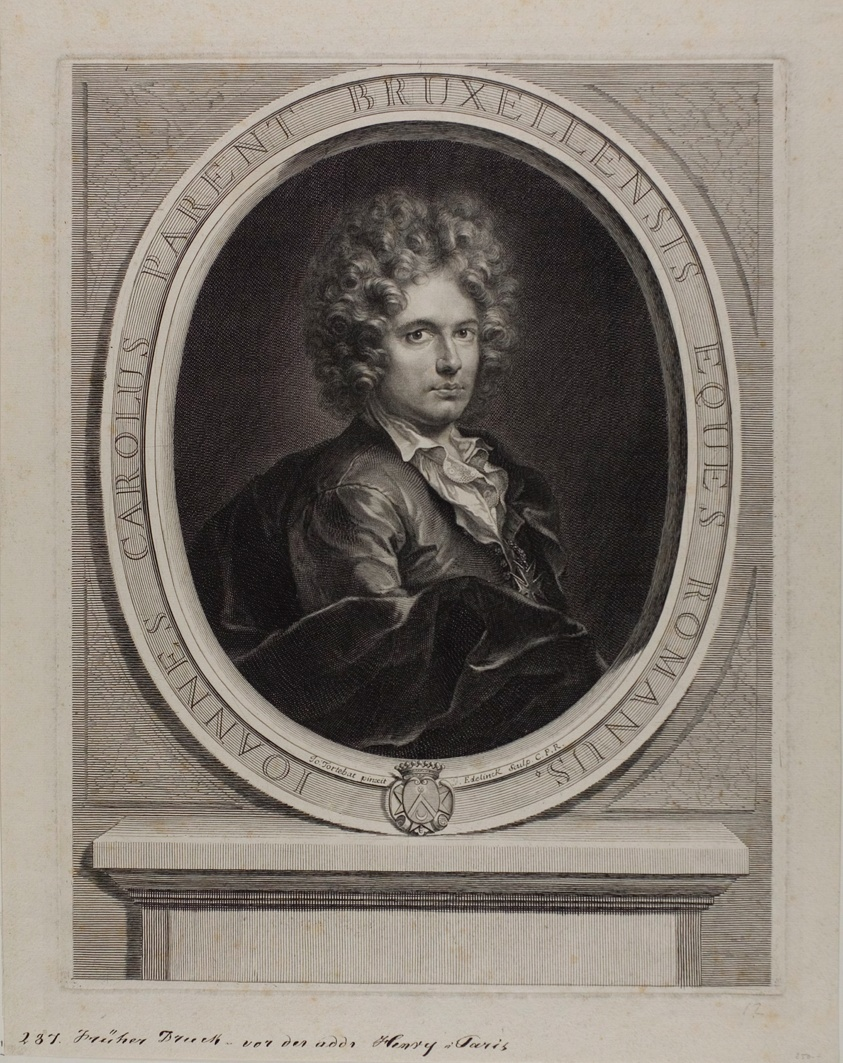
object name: Print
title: Jean-Charles Parent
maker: Gérard Edelinck (French, born Flanders, 1640-1707); after François Tortebat (French, c. 1621-1690)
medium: Engraving on paper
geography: France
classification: engraving; print; prints and drawing